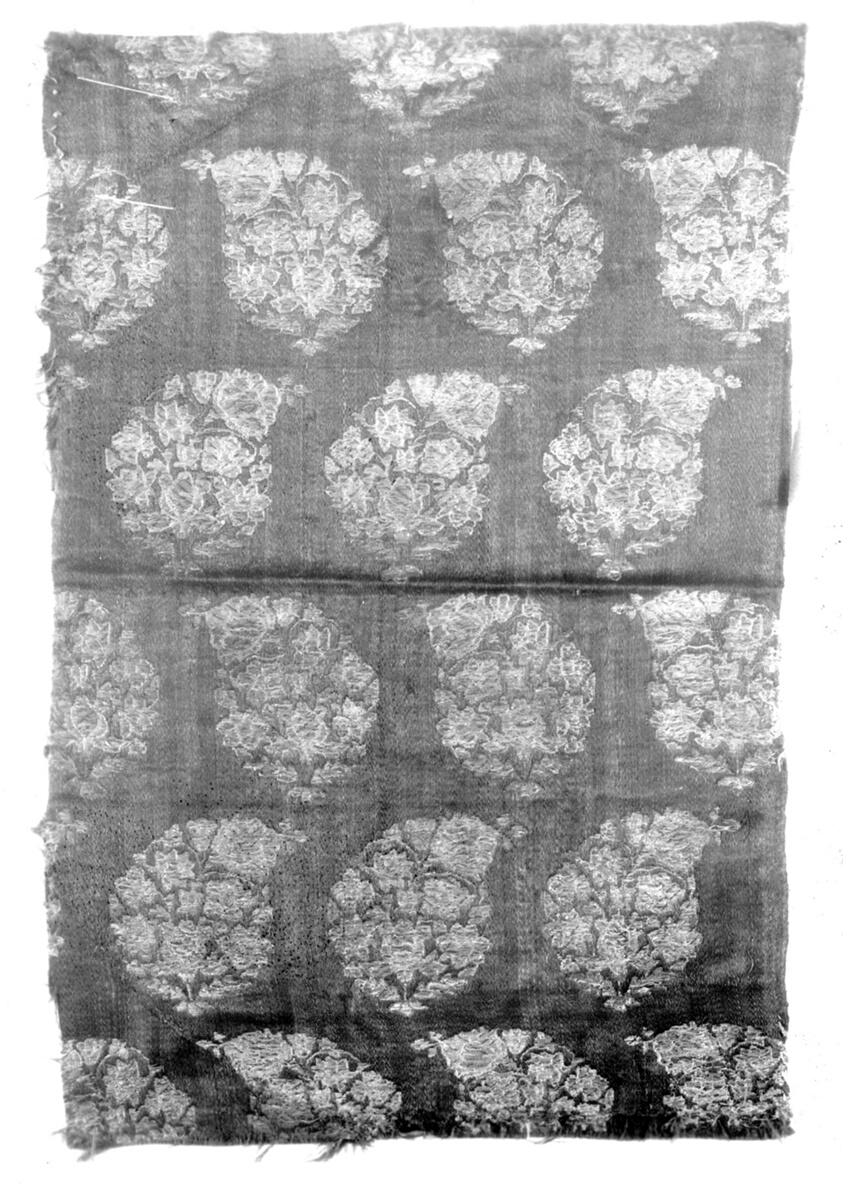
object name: Textile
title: Fragment (Dress Fabric)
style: kashan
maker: Iran (Kashan)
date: 18th century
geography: Iran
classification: textile; weaving